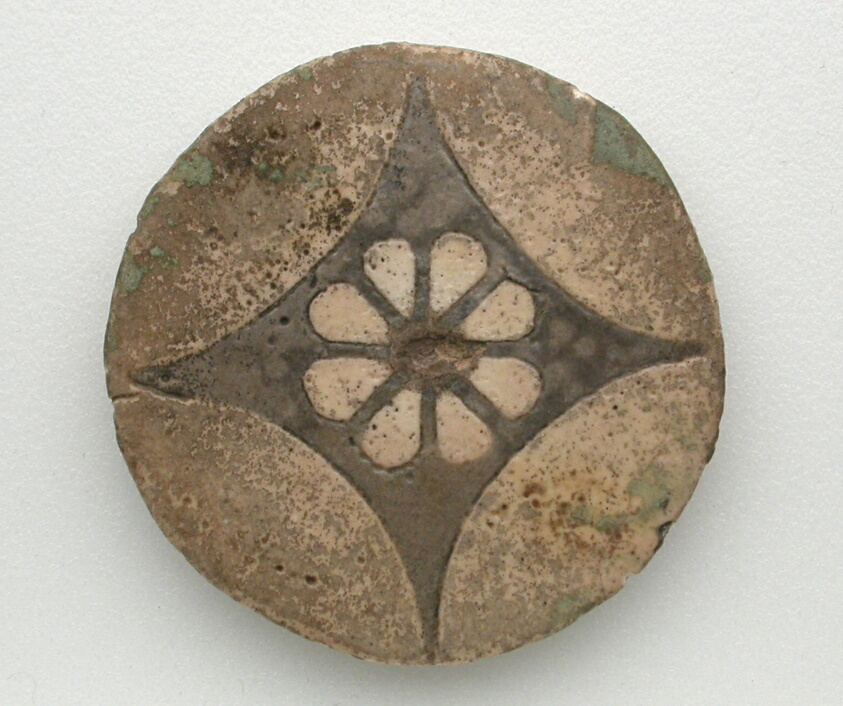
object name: Decorative Arts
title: Rosette from the Temple of Ramesses III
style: new kingdom, egyptian, ancient, ramesside period, twentieth dynasty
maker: Egyptian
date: New Kingdom, Dynasty 20 (1186–1069 BCE)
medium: Faience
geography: Egypt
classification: inlay; ceramics; ancient art; decorative arts; faïence (composite material)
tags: flowers